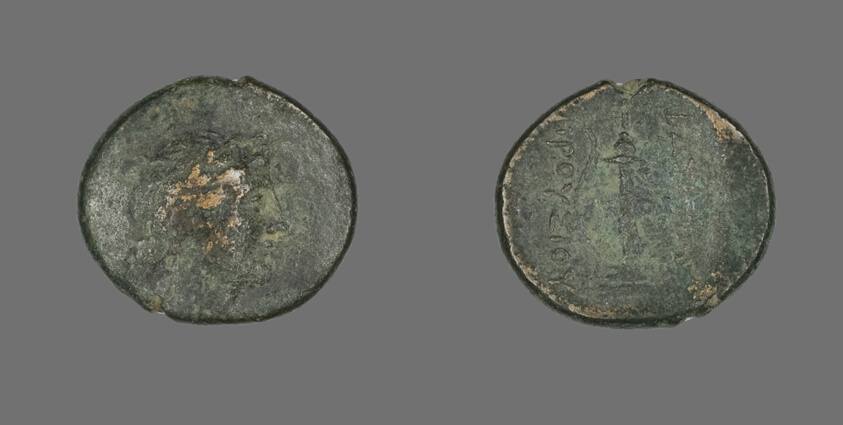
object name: Coin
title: Coin Depicting the God Apollo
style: greek, ancient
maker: Greek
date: 238-183 BCE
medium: Bronze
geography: Ancient Greece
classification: coin; ancient art